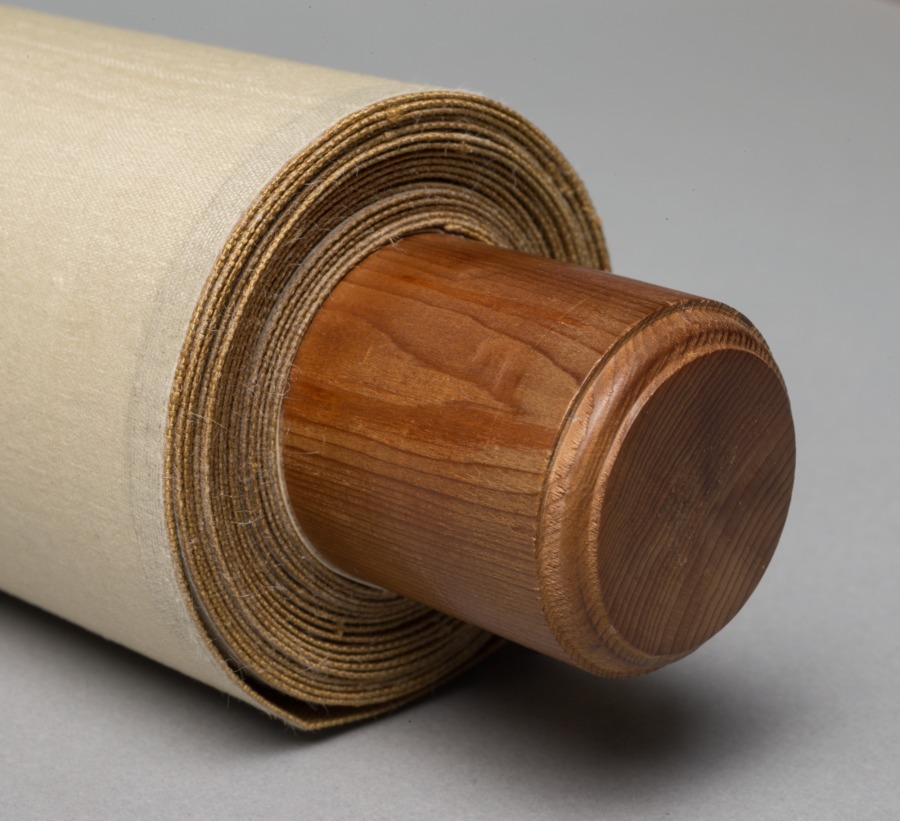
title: Departure from Kashima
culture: Japan, Nanbokuchō period (1336–92)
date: 1336–92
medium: hanging scroll; ink and color on silk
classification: Painting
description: The kami Takemikazuchi from Kashima (in present-day Ibaraki Prefecture) departs on a white deer for Mount Mikasa in Nara, where he takes up residence. The five Kasuga kami are presented within a golden circle supported by the branches of a sakaki tree, from which trail five white paper streamers—indicating the purity and sacredness of the five shrine halls of the complex—as well as blossoming wisteria vines, a symbol of the Fujiwara family. The two figures walking along near the stag’s back legs are Nakatomi no Tokifū and his younger brother Hidetsura, who have followed Takemikazuchi and become priests of Kasuga Taisha.